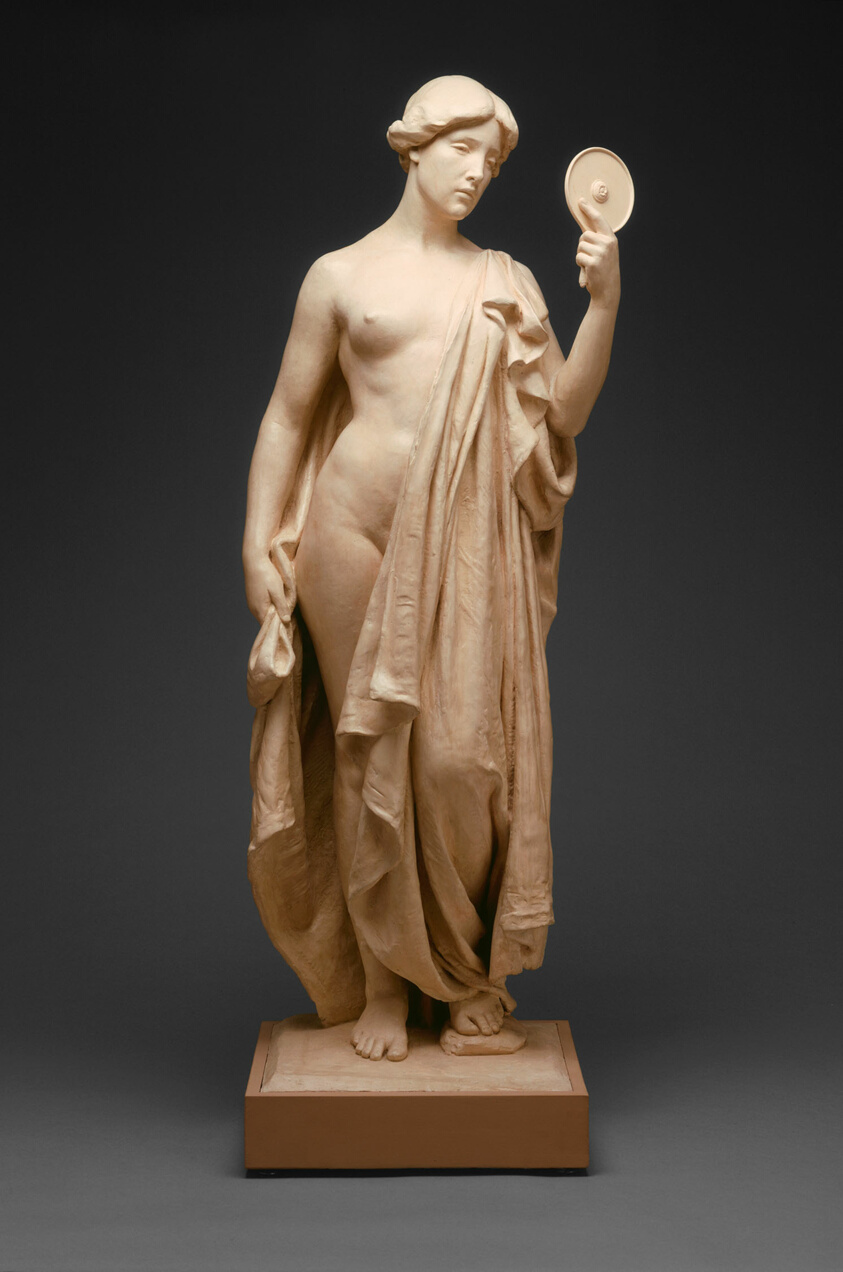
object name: Sculpture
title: Truth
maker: Daniel Chester French (American, 1850–1931)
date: 1900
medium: Plaster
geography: New York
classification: sculpture; american arts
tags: people, portraits